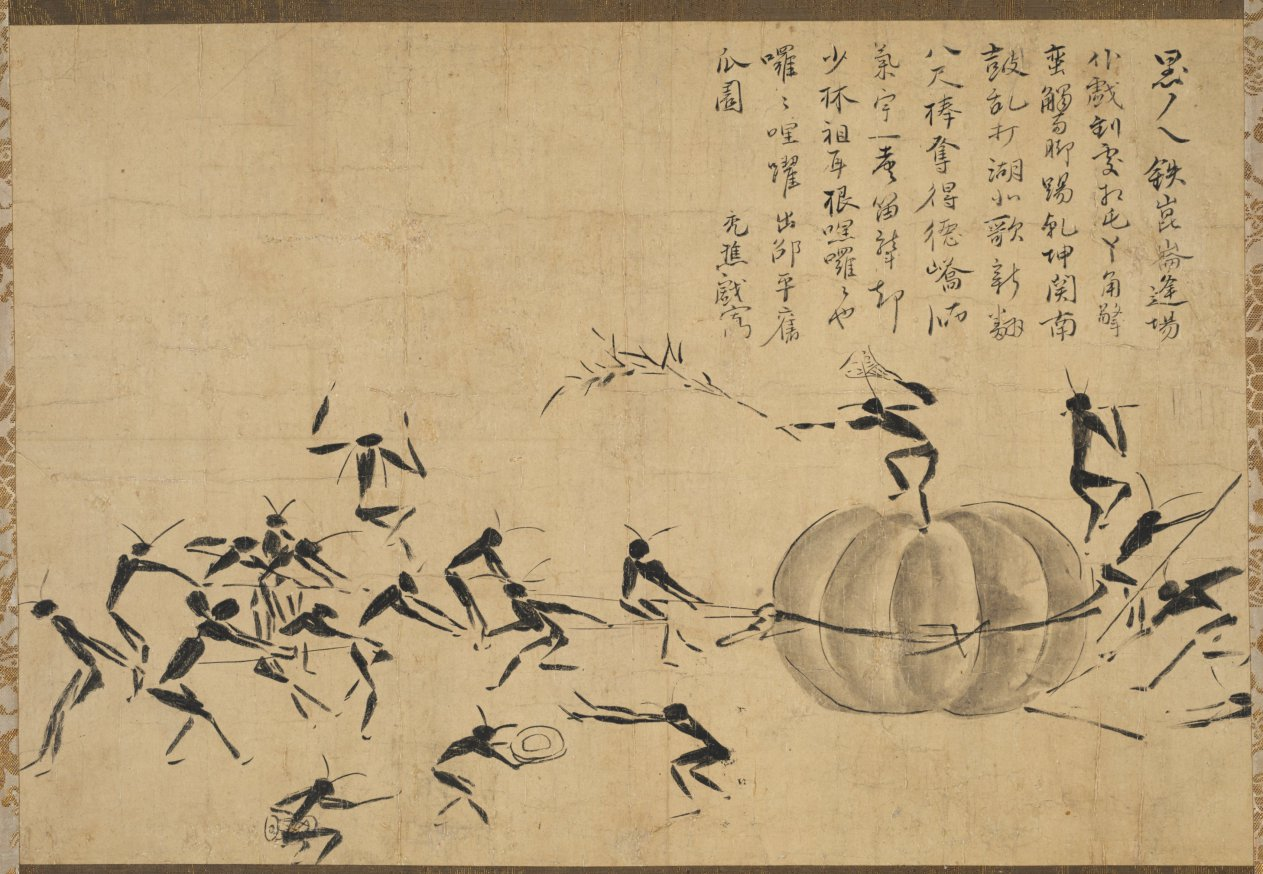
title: Festival of Insects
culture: Japan, Edo period (1615–1868)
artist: after Motsurin Jōtō (Japanese, d. 1492)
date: c. 1615–1868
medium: Hanging scroll; ink on paper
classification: Painting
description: This painting depicts humanlike figures with antennae engaged in a festival procession. They transport a gourd like a float, with two teams pulling ropes in front, and others maneuvering it with poles from behind. They are accompanied by flutes and drums, urged on by a dancer holding a fan and a branch. The inscription is attributed to the monk-painter Motsurin Jōtō (Bokusai), well known in Japan as a disciple of Ikkyū Sōjun and an accomplished portrait artist.